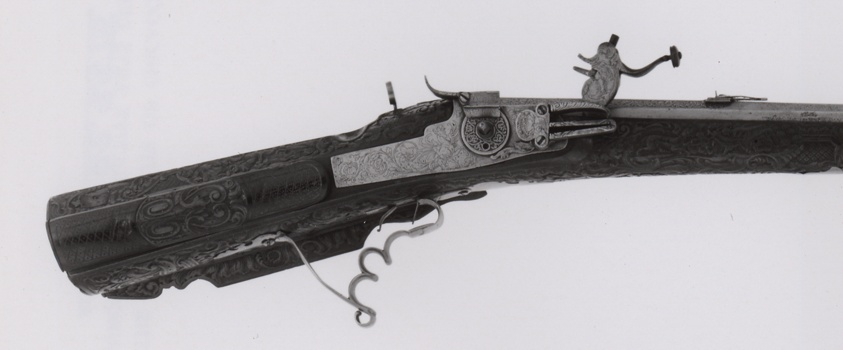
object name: Arms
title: Wheellock Sporting Rifle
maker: Barrel: Johan Bichler; German, Augsburg, active 1595-1625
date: c. 1600/25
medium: Steel, iron, brass, wood, and horn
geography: Augsburg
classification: firearm-long gun; arms; arms and armor